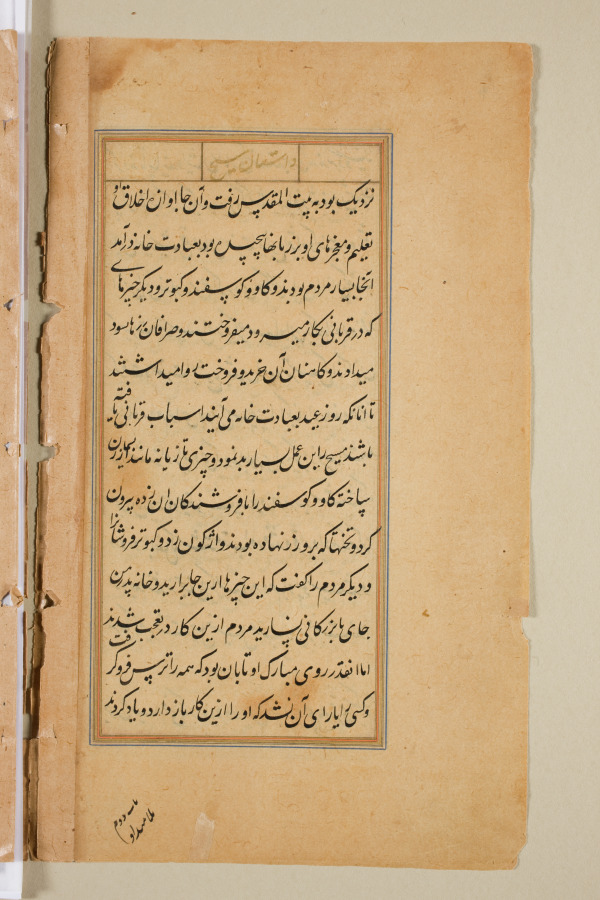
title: Text page from a Mirror of Holiness (Mir’at al-quds) of Father Jerome Xavier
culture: Mughal India, Allahabad, made for Prince Salim (1569–1627)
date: 1602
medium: Ink and gold on paper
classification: Manuscript